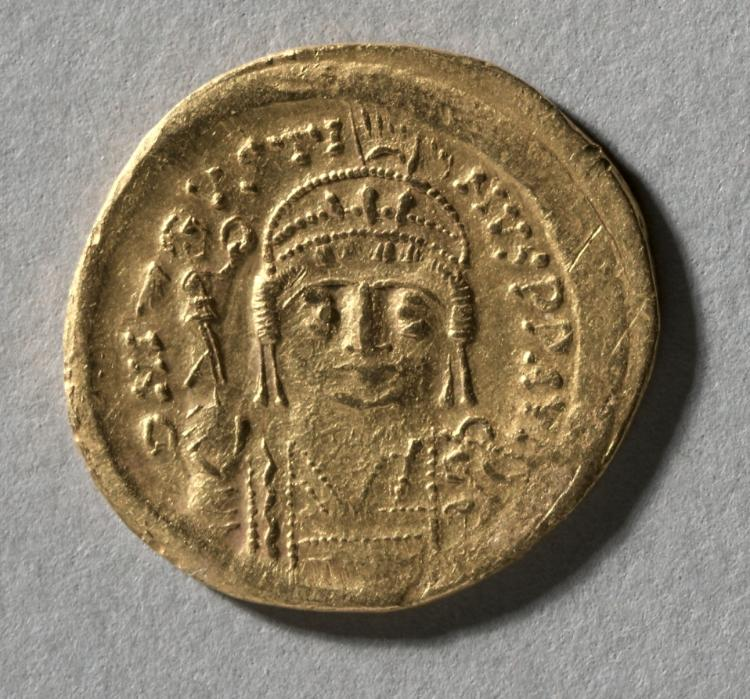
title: Solidus of Justin II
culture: Byzantine, 6th century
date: 565–578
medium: gold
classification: Coins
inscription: (Avers): DNI VST NVSPPAVI (Revers): VICTORI AAVCCCH and CONOB